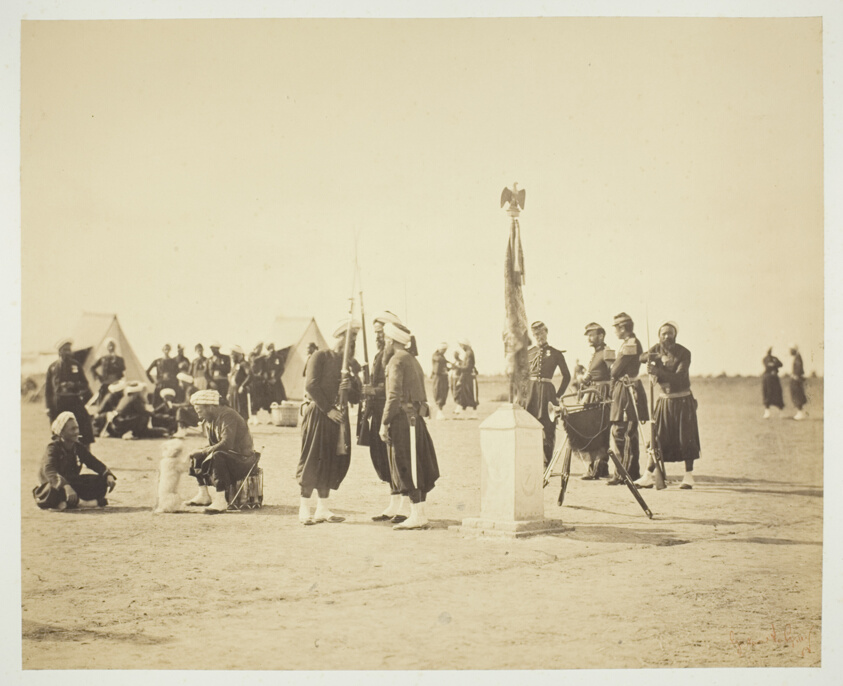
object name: Photograph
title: The Raised Flag of the Zouave Regiment, Camp de Châlons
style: 19th century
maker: Gustave Le Gray (French, 1820–1884)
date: 1857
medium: Albumen print, from the album "Souvenirs du Camp de Châlons"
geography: France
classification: albumen silver print; photographic process; photography; photograph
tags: Paris, documentary